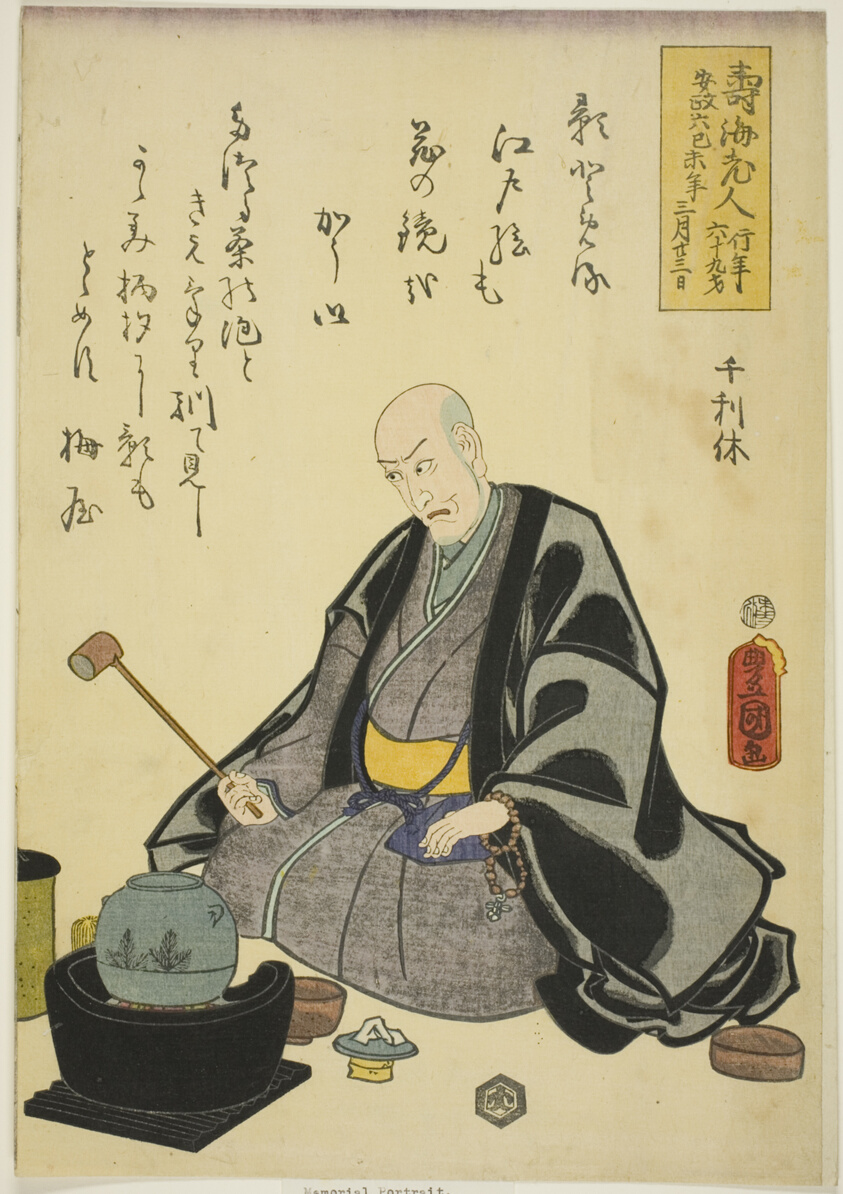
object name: Print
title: Memorial Portrait of the Actor Ichikawa Ebizo V (Ichikawa Danjuro VII)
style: Japanese (culture or style)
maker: Utagawa Kunisada I (Toyokuni III) (Japanese, 1786-1864)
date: 1859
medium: Color woodblock print; oban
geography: Japan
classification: print; asian art